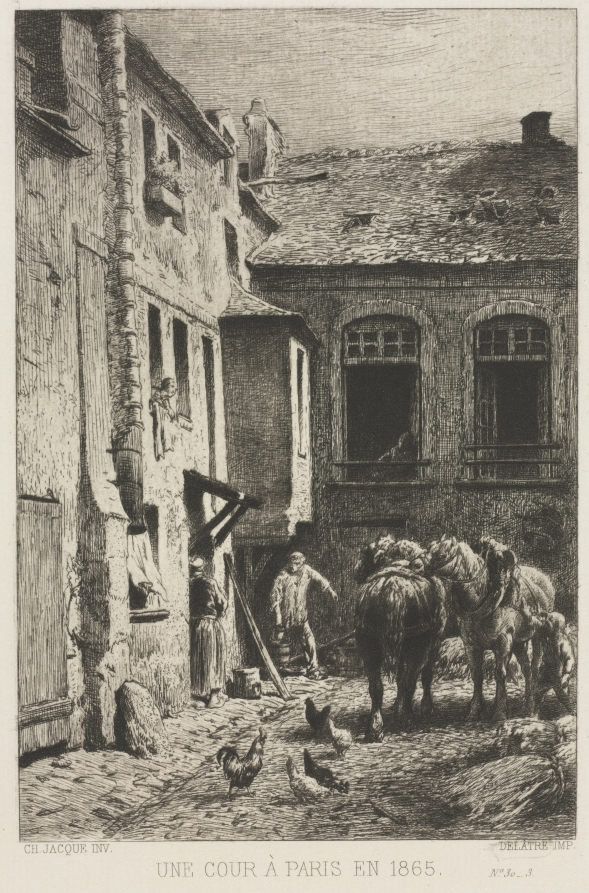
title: A Courtyard in Paris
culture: France, 19th century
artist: Charles-Émile Jacque (French, 1813–1894)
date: 1865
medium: etching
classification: Print